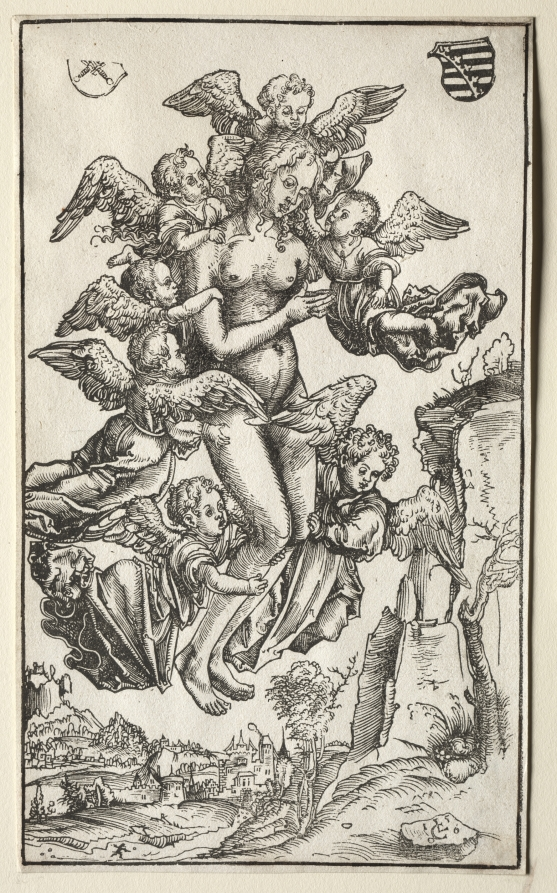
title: The Ecstasy of Saint Mary Magdalene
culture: Germany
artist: Lucas Cranach (German, 1472–1553)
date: 1506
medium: woodcut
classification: Print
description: According to medieval legend, Mary Magdalene was a fallen woman until she devoted herself to Christ. During her ascetic life in the wilderness, angels raised her aloft seven times a day to hear the music of the heavenly host while her visions of paradise enhanced her radiance. Interested in reviving classical ideals, Renaissance artists such as Lucas Cranach the Elder gave Mary Magdalene a Venus-like body to personify her divine beauty.